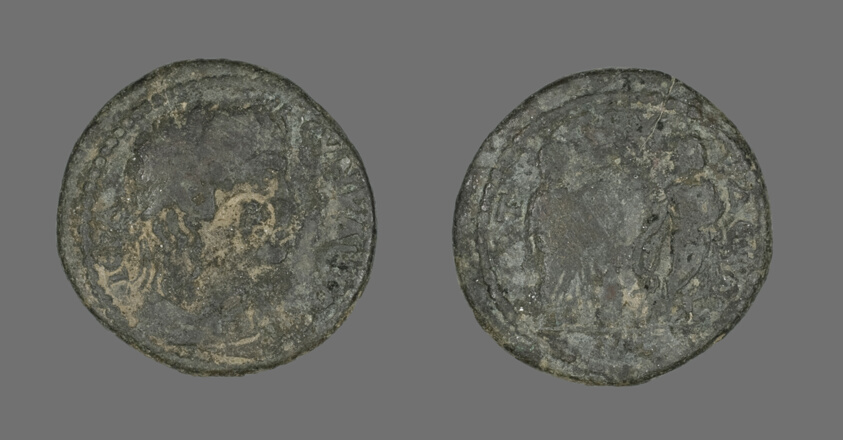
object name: Coin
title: Coin Depicting Draped Bust of the Roman Senate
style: roman (ancient, style or period)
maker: Roman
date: 193-211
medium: Bronze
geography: Roman Empire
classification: coin; ancient art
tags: gods (deities)